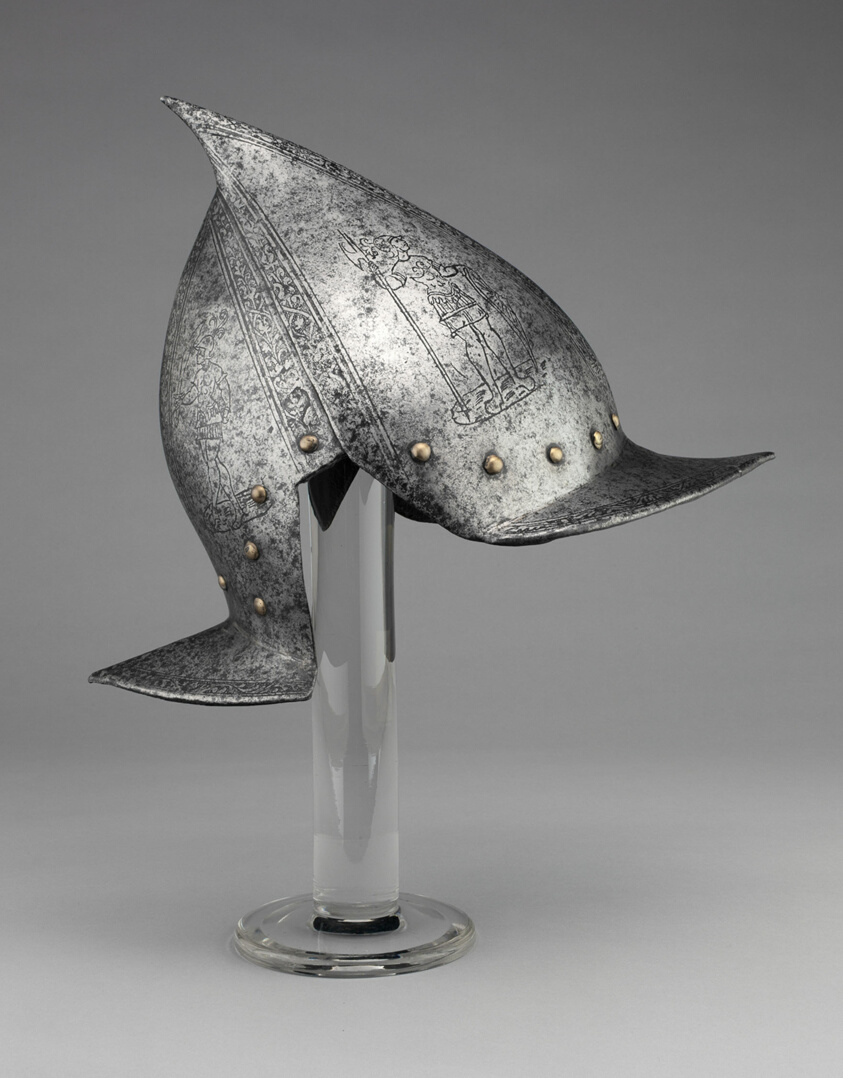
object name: Armor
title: Morion-Burgonet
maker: North Italian, probably Brescia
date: 1570-80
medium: Steel and brass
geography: Brescia province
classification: suit-helmet; armor; arms and armor